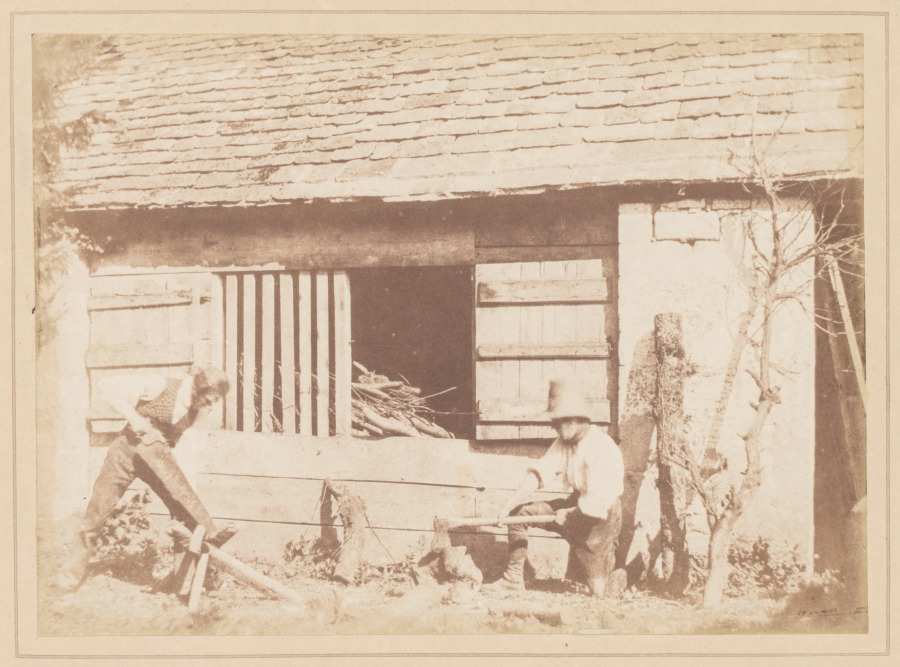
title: The Woodcutters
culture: England, 19th century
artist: William Henry Fox Talbot (British, 1800–1877)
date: 1845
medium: salted paper print from calotype negative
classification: Photograph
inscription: Written in black ink on verso: "LA 509 [crossed out] 559"